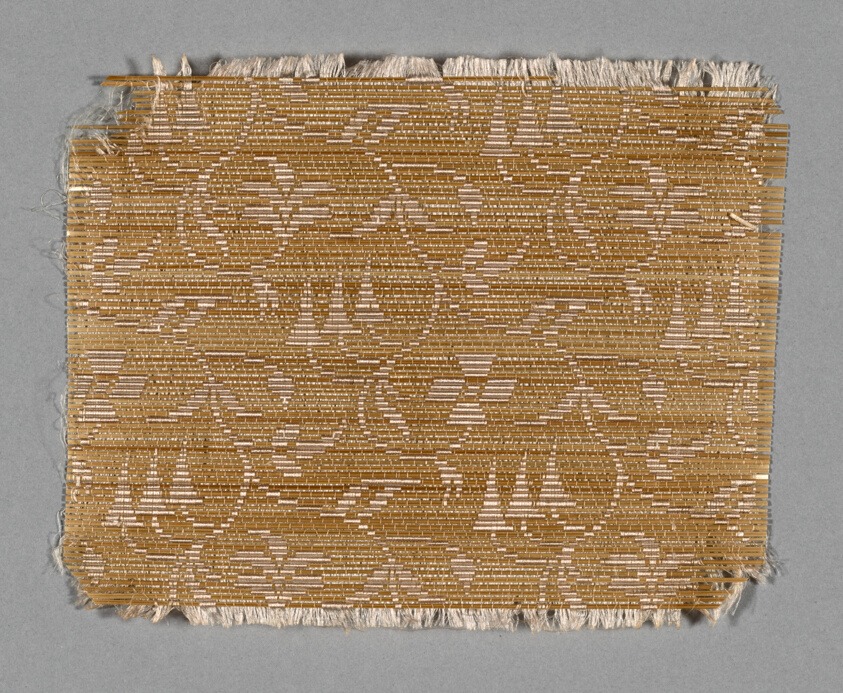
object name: Textile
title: Sample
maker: France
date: 19th century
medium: Silk and straw, plain weave self-patterned by areas of twill interlacing over interlacing; woven on loom with Jacquard attachment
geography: France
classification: textile; weaving